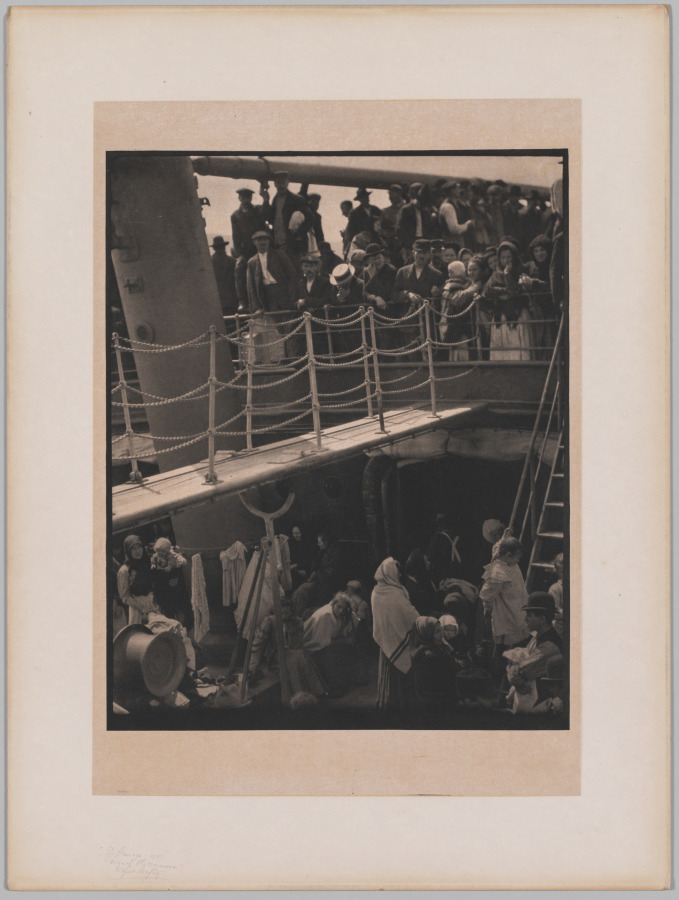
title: The Steerage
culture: America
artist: Alfred Stieglitz (American, 1864–1946)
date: 1907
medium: photogravure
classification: Photograph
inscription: Written in pencil on recto of mount in lower left: “The Steerage-1907/original Photogravure/Alfred Stieglitz (signed)”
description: With his camera, Stieglitz transformed a scene of impoverished immigrants returning to Europe into a study in shape and form; the image sparked his evolution from a pictorialist into a modernist. Reflecting on his career in 1942, Stieglitz proclaimed this image, taken in 1907, as an achievement of modern art that anticipated Cubism.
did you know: This print is Alfred Stieglitz’s own, lifelong copy of The Steerage, one of his most important works.